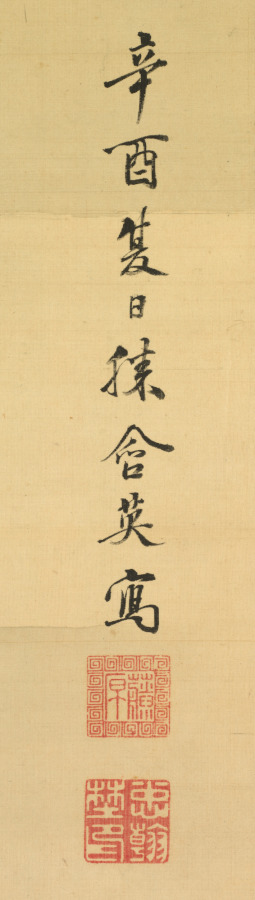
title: Symbols of Longevity: Deer under Peach and Pine (Pine) (right)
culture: Japan, Edo period (1615–1868)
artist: Toda Tadanaka (Japanese, 1761–1823)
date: 1801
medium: Pair of hanging scrolls; ink and color on silk (ivory roller ends)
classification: Painting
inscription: Righthand painting sealed lower right: rectilinear red seal above; unread, square red seal below; unread (a collector's seal)